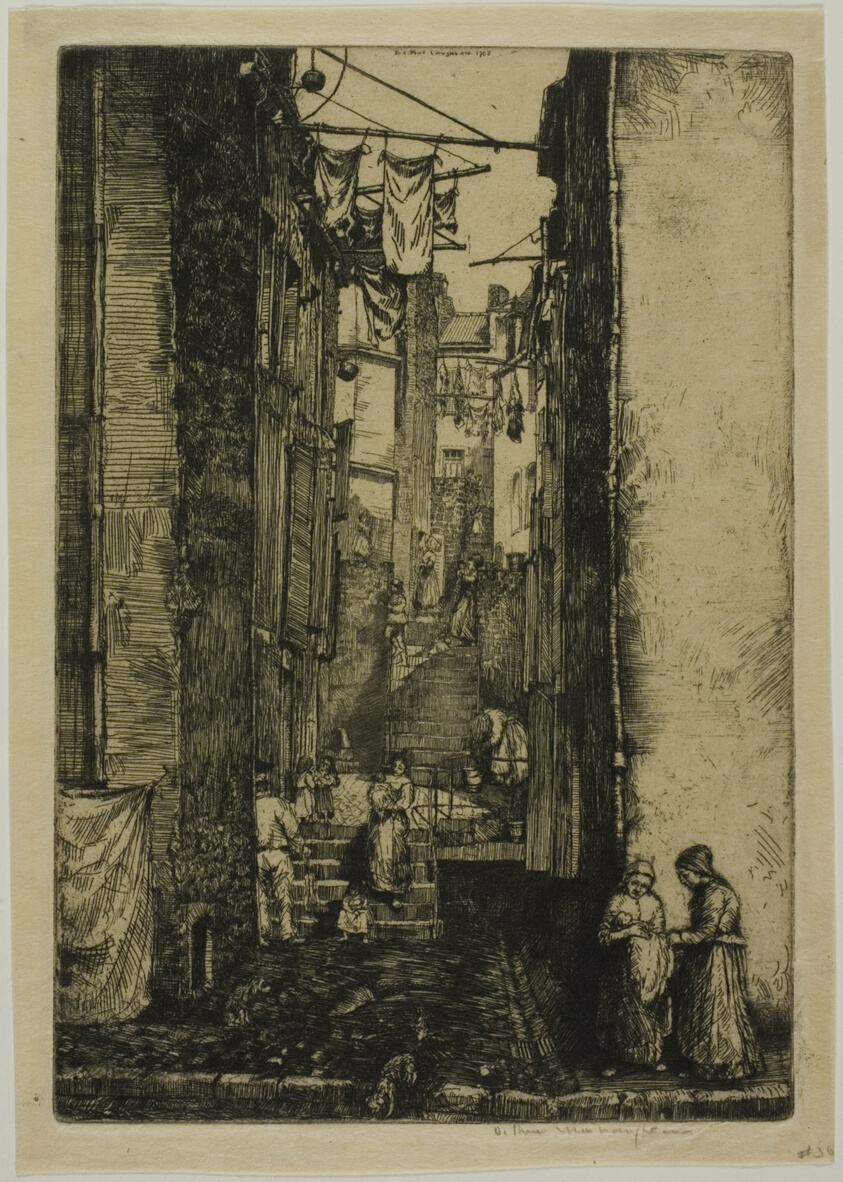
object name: Print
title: Ruelle du Pêcheur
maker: Donald Shaw MacLaughlan (American, born Canada, 1876-1938)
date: 1902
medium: Etching in black on cream wove paper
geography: United States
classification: etching; print; prints and drawing